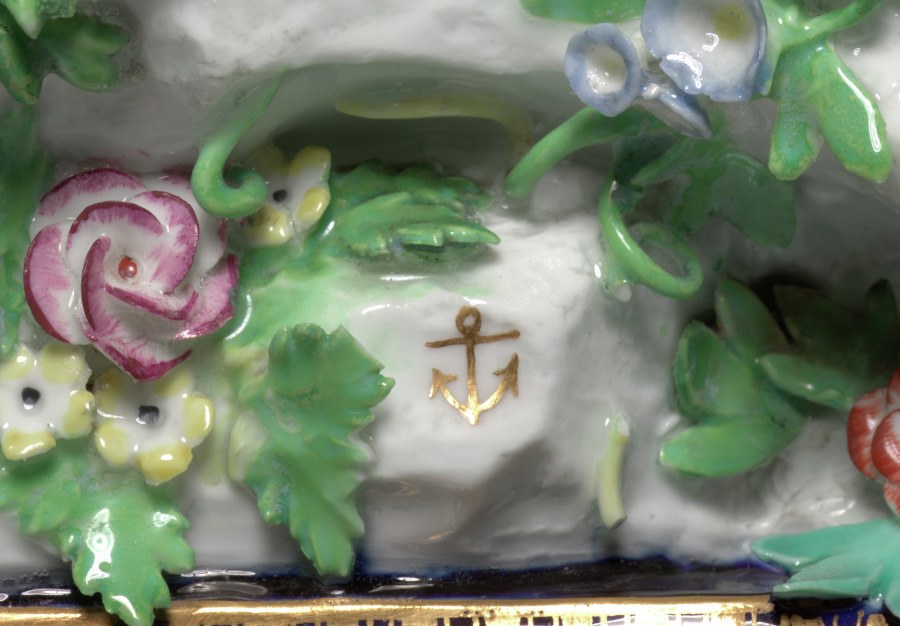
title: Figure of the Pietà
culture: England, London, Chelsea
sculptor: Joseph Willems (Flemish, 1715–1766)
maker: Chelsea Porcelain Factory (Britain, London, 1745–84)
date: c. 1761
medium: Soft-paste porcelain, painted in enamels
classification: Ceramic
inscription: Painted in gilt over the glaze at base of figure on the reverse: [a gold anchor]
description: The distinctively Roman Catholic subject of Mary cradling her son, the crucified Christ, suggests this figure was probably made for one of the aristocratic English families forced to practice their Catholicism in secret during the mid-1700s. Because of the laws banning Catholic worship in England, grand houses were often modified to include private chapels or rooms in private quarters where visiting priests delivered the sacraments in defiance of the laws favoring Protestant worship. A figure of this size and type likely would have served as an important devotional focal point within that context.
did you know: Only three examples of this figure by the Chelsea Porcelain Factory are known to exist.